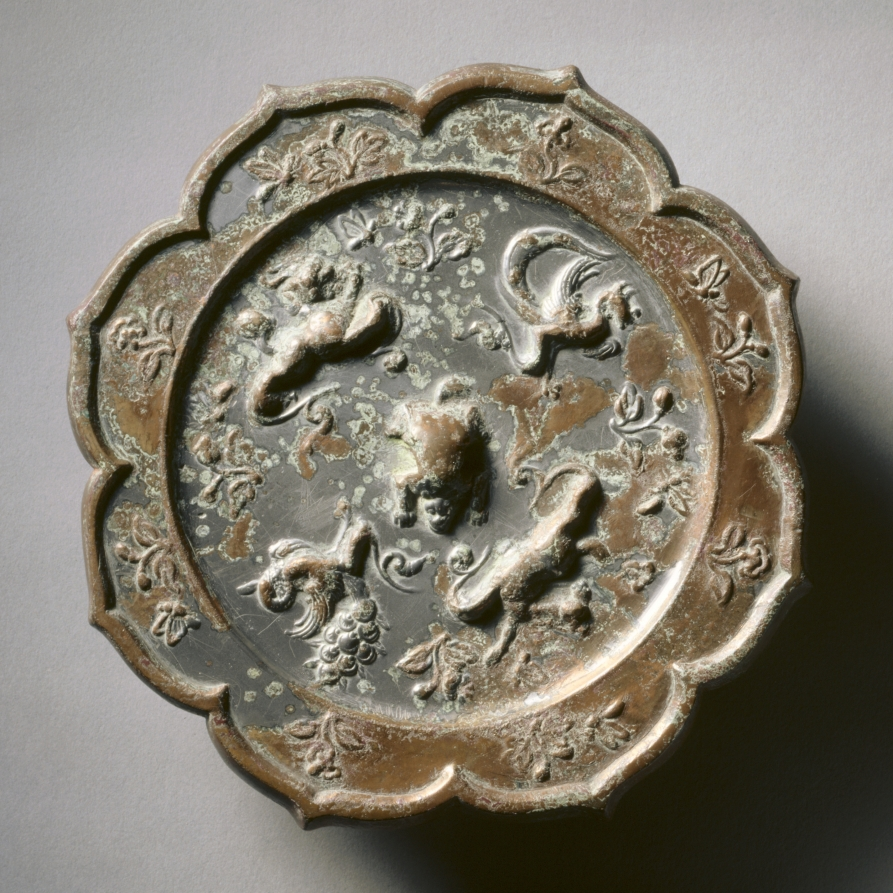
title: Octafoil Mirror with Crouched Animals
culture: China, Tang dynasty (618-907)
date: early 600s-early 900s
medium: bronze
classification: Metalwork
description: The mirror was cast using lost-wax technology. Extensive chisel work was done to finish the back. Harsh chemicals were used to remove the corrosion from the mirror, leaving re-deposited copper scattered on the surface.